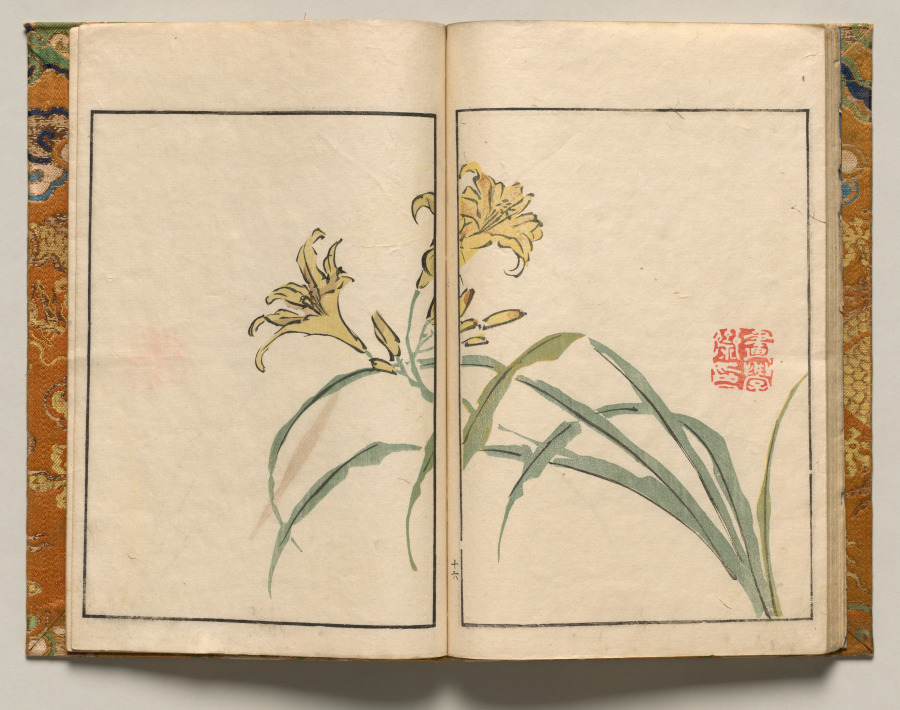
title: Lilies, Design Sixteen from Shazanrō Picture Book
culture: Japan, Edo period (1615–1868)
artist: Tani Bunchō (Japanese, 1763–1841)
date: 1816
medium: woodblock-printed book; ink and color on paper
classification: Bound Volume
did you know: Shazanrō was one of Tani Bunchō's style names.